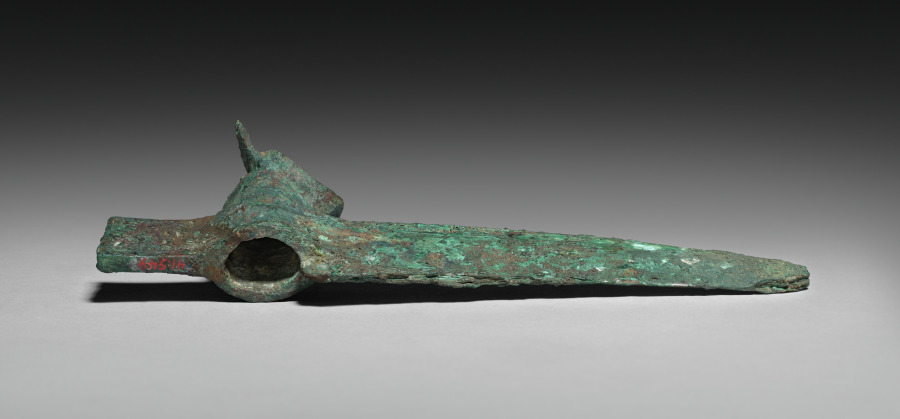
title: Axe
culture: China, Shang dynasty (c. 1600–c. 1046 BCE)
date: 1766–1045 BCE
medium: bronze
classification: Metalwork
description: The head of an owl with large eyes and ears, sitting above the blade of a halberd-axe, may have deterred evil and harm from its carrier. Whether such an axe was used in ritual or warfare is not clear.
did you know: A staff or pike would have attached to the blade via the socket below the owl's head.